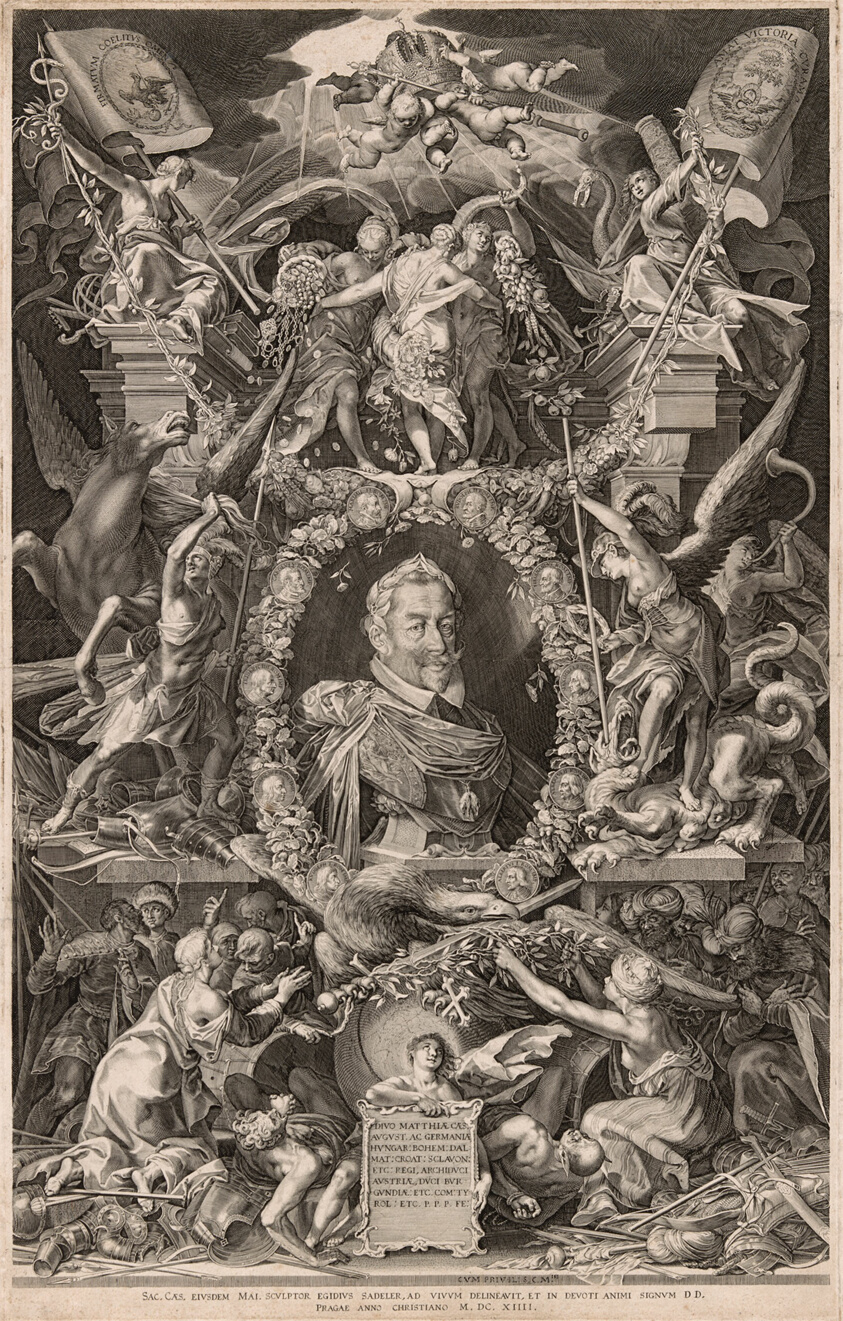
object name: Print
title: Portrait of Emperor Matthias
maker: Aegidius Sadeler; Flemish, c. 1570-1629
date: 1614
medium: Engraving in black on ivory laid paper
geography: Flanders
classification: engraving; paper; print; prints and drawing